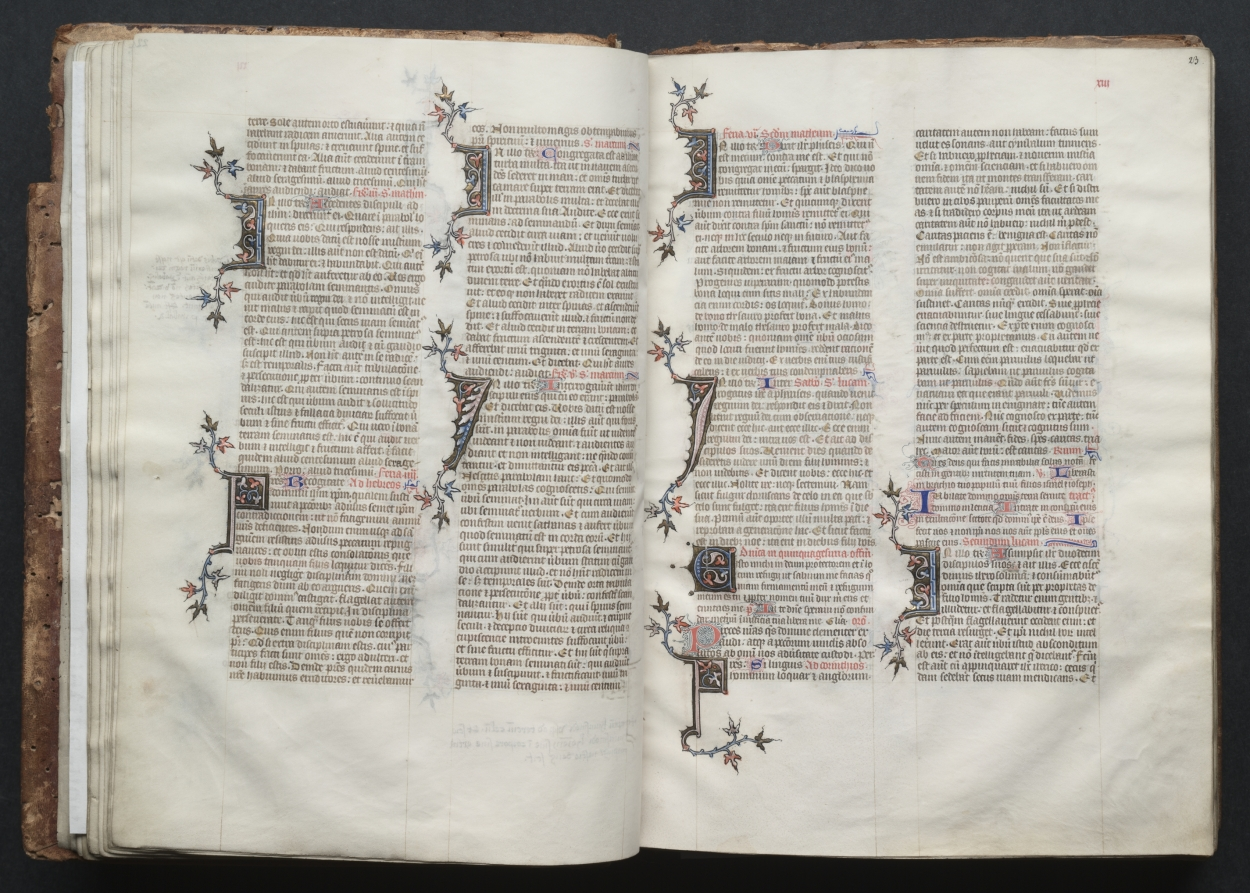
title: The Gotha Missal: Fol. 22v, Text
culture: France, Paris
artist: Master of the Boqueteaux (French)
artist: and Workshop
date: c. 1375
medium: ink, tempera, and gold on vellum; blind-tooled leather binding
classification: Bound Volume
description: The style and quality of this manuscript's decoration is typical of deluxe Parisian books made for aristocratic or royal patrons. Most of the book's decoration appears to be the work of the Master of the Boqueteaux, an artist active at the court of King Charles V (died 1380). His style was apparently shared by a number of book illuminators working in and around Paris. It is very possible that the Gotha Missal belonged to Charles V, but is not provable because the manuscript has no royal portraits and lacks a colophon. Given the book's magnificent decoration, however, it would seem that it was produced for a Valois prince, if not for the king himself. The manuscript receives its name from the German dukes of Gotha, its later owners.